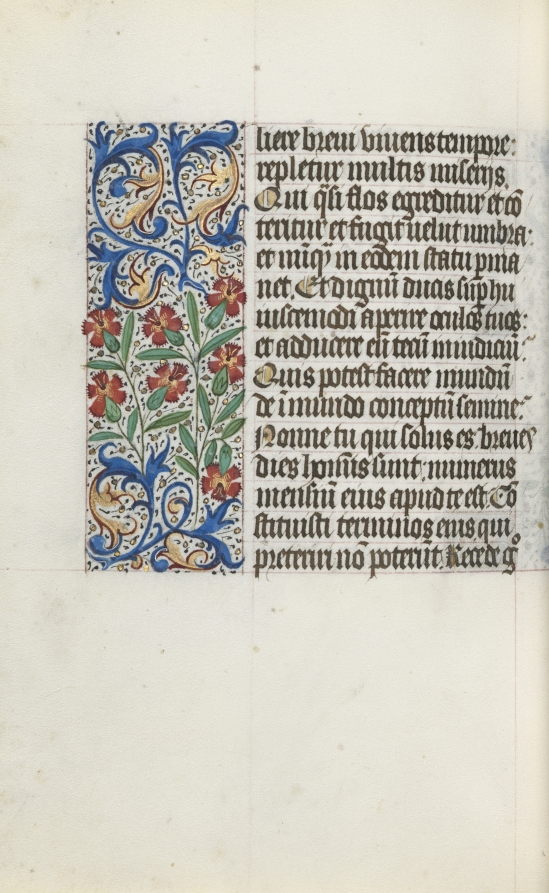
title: Book of Hours (Use of Rouen): fol. 123v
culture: France, Rouen, 15th century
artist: Master of the Geneva Latini (French, active Rouen, 1460–80)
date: c. 1470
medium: ink, tempera, and gold on vellum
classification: Bound Volume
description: In the late 1400s and early 1500s Rouen was an established and important center of book production. The city’s cathedral had a wealthy chapter that spent large sums of money to commission books and to maintain its extensive library. The stationers and booksellers would have likely been concentrated in or near the cathedral precinct. This artist, named after a manuscript now in Geneva, was Rouen’s principal illuminator during the second half of the 1400s.